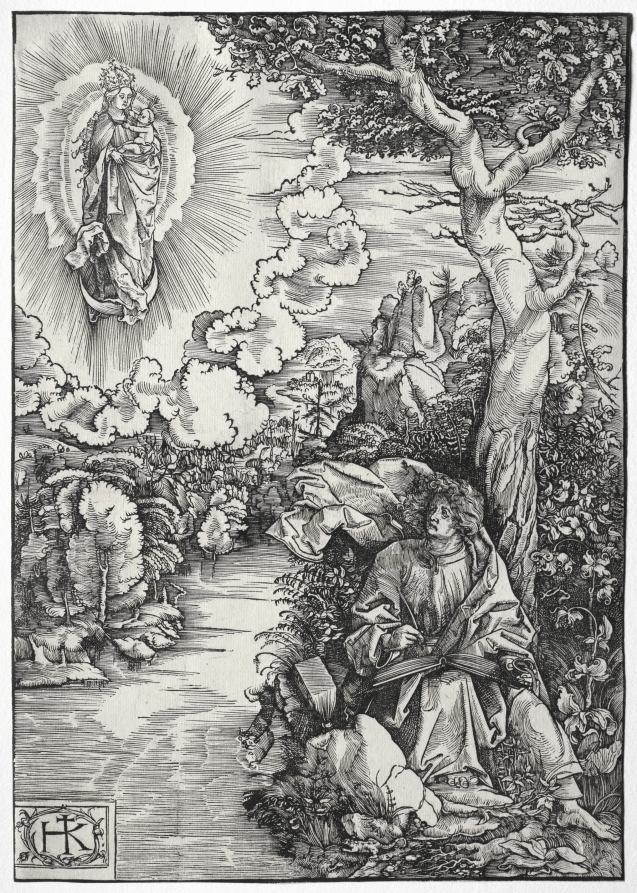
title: St. John on the Island of Patmos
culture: Germany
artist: Hans Wechtlin (German, 1480/85–after 1526)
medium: woodcut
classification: Print